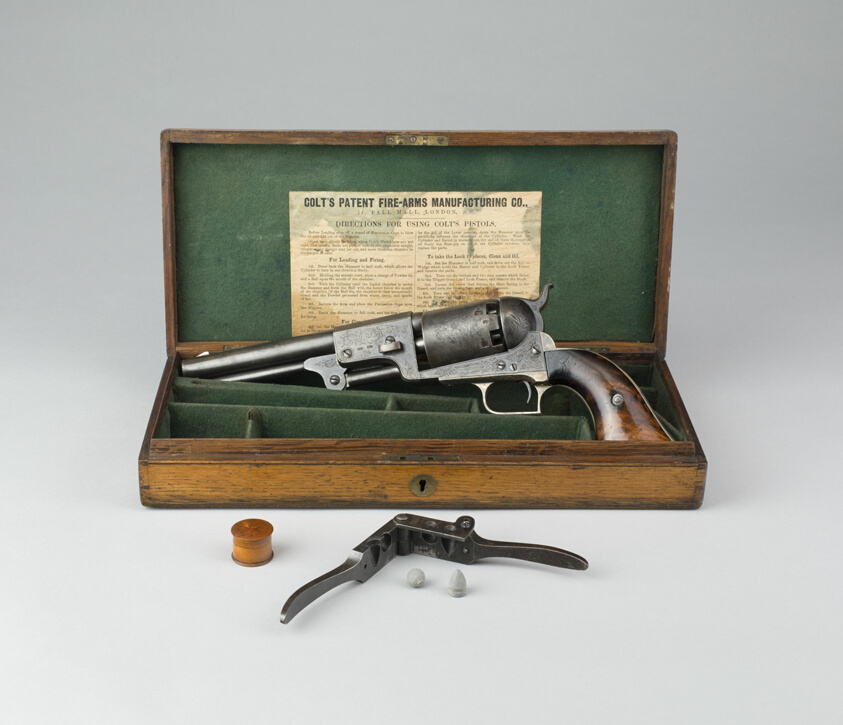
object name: Arms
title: Cased Colt Dragoon Model 1848 (1st issue) Revolver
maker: English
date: 1848/68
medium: Steel, brass, oak (case), lead (bullets), and ivory (cap box)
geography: England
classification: firearm-handgun; arms; arms and armor